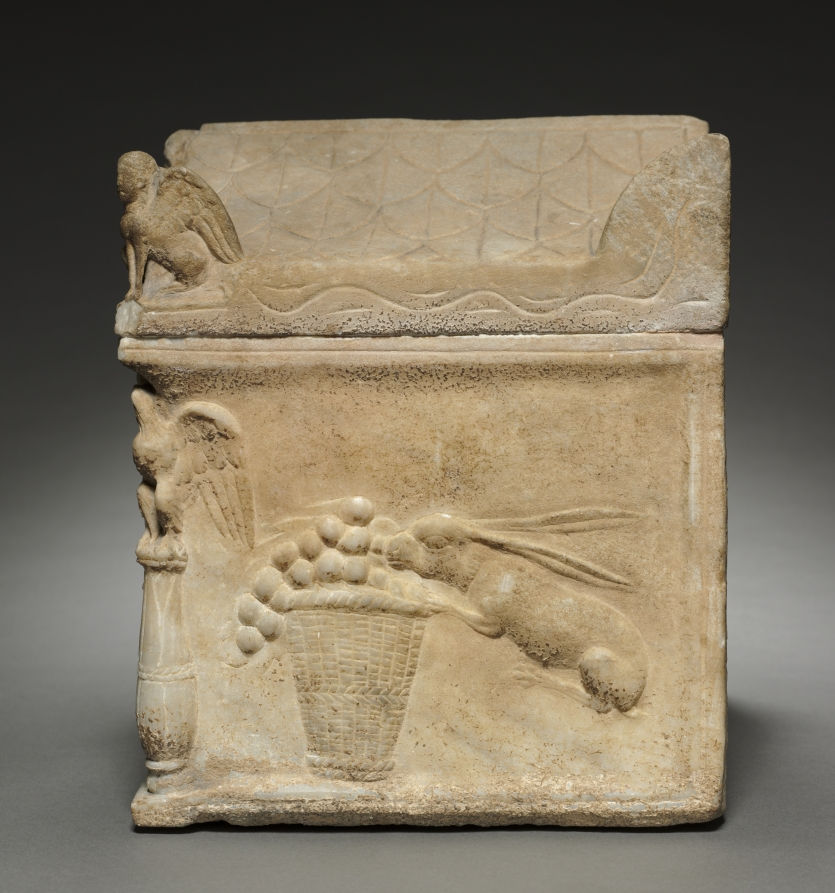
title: Cinerary Box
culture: Italy, Roman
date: 1–100 CE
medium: marble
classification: Sculpture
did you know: The central rectangular plaque would have been inscribed with an epitaph, either painted or carved.